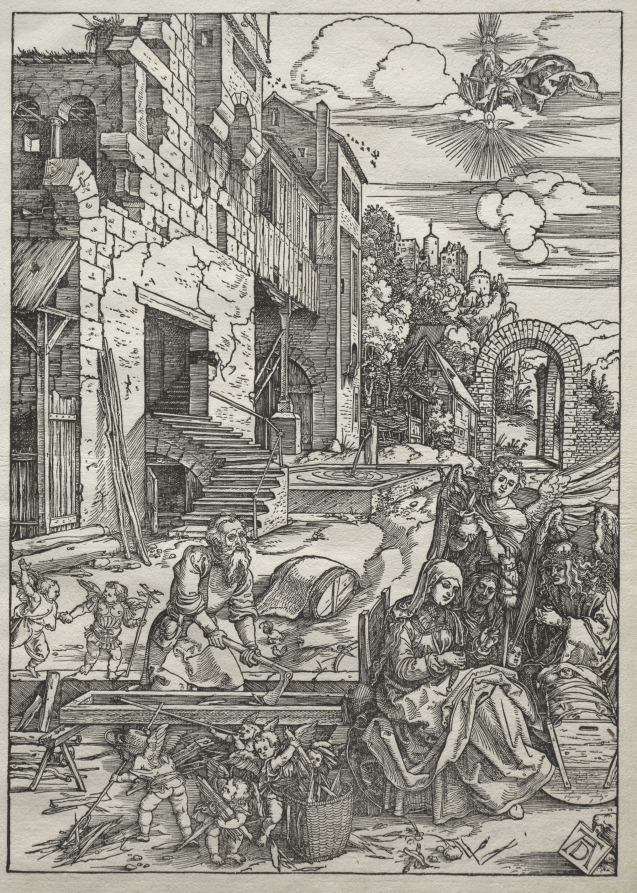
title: Life of the Virgin: The Rest in Egypt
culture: Germany, early 16th Century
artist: Albrecht Dürer (German, 1471–1528)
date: 1504–1505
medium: woodcut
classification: Print